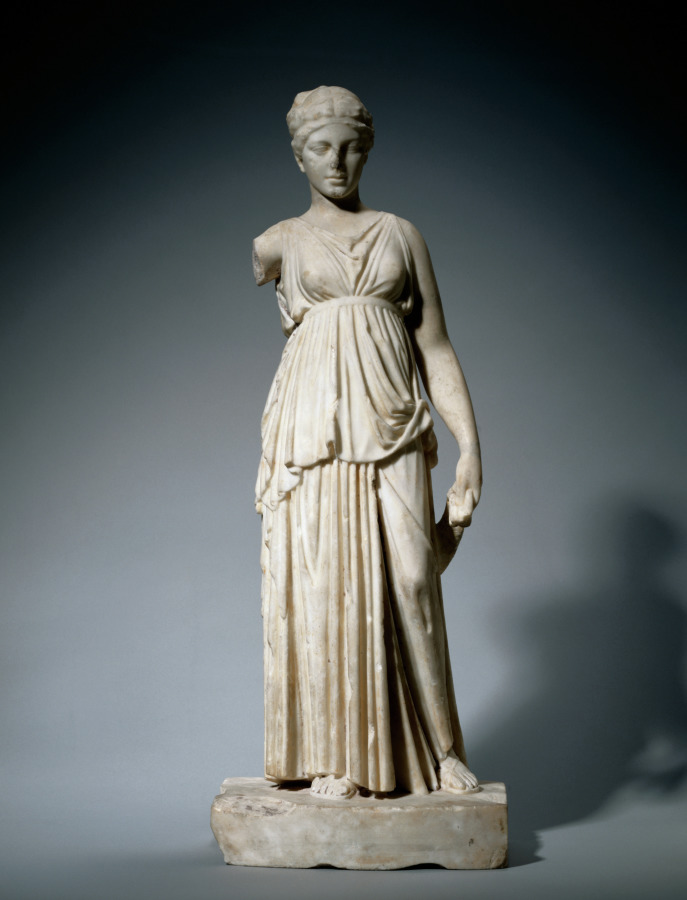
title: Dancer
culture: Greece, Alexandria(?)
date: c. 50 BCE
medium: marble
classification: Sculpture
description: The pose and dress of this statuette of a woman, together with her elaborate sandals and hairstyle, suggest that she represents a dancer. Standing with one knee slightly bent, she holds a sash in her lowered left hand. The sash passes behind her back, probably to be held aloft in her right hand, now separated. She wears a chiton, a rectangular sheet folded at the top to create a large overhang, then wrapped around the left side of the body and pinned at the shoulders. Belted high above her waist, the fabric cascades in deep folds.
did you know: Three nonjoining fragments, including a right hand and arm, may belong to this statuette.